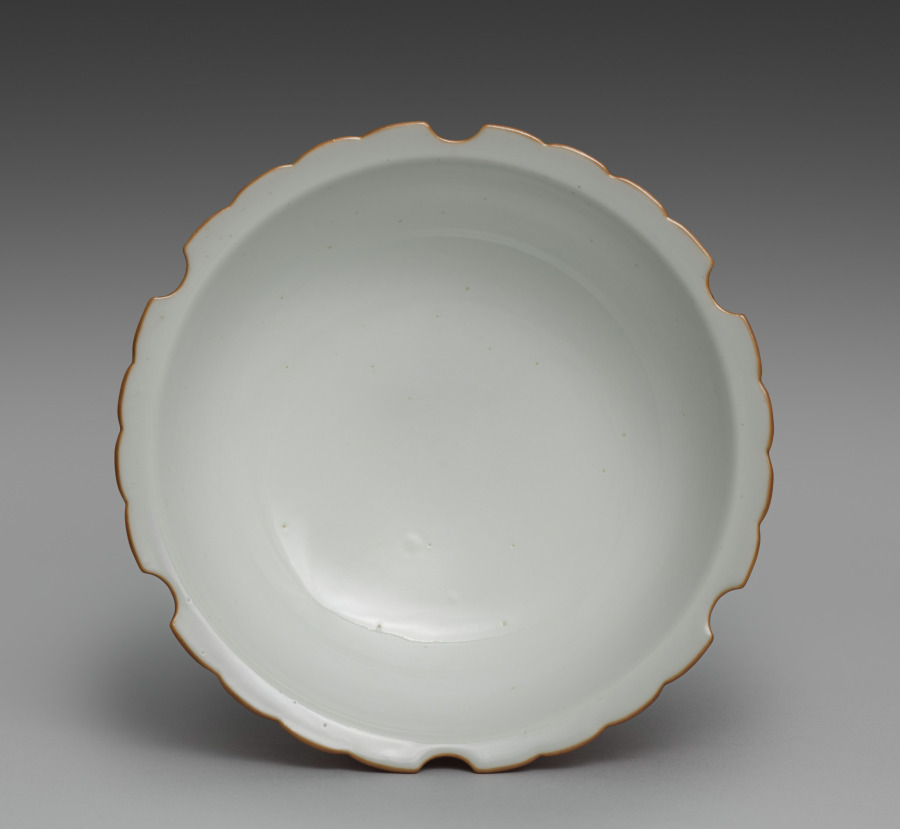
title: Dish from Snow-Flake Side Dishes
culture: Japan, Meiji period (1868–1912)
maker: Seifū Yohei III (Japanese, 1851–1914)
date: 1893–1914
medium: One from a set of six porcelain dishes; porcelain with lobed rims and pink glaze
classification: Ceramic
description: According to the box lid, this set of 6 side dishes, or mukōzuke, are “snow-flower style” (sekkashiki), having mouths shaped like snowflakes. Their mouths, which have 6 lobes and scalloped edges, are traced with brown iron oxide at the rim. The outside of each bowl is glazed with a very bright pink over the basin and foot, and the inside is left white. From directly above, one sees a snowflake-like shape, and from the side, they seem to float above a rosy ground.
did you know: The box for this set of dishes has an inscription on the side noting that they were for a person with the family name Nakamoto.